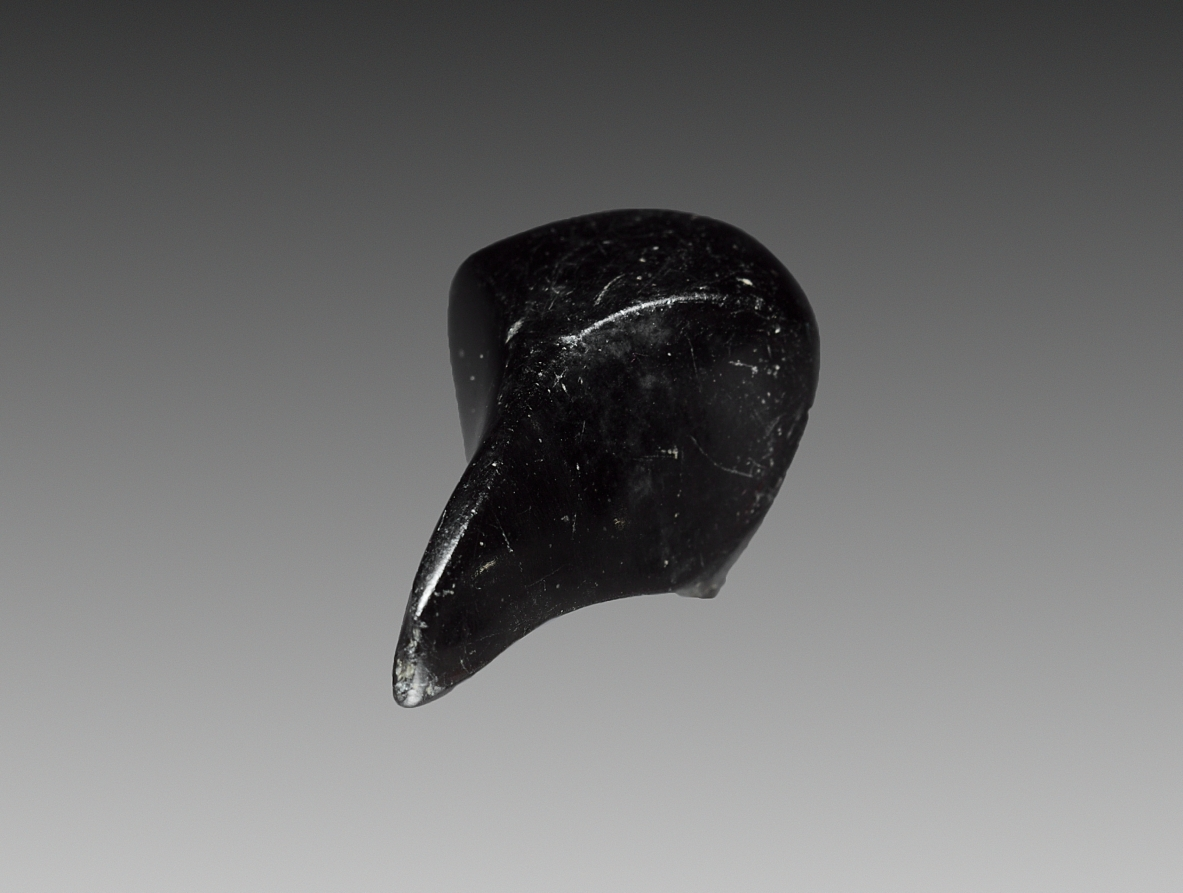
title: Bird Head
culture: Mexico, Valley of Mexico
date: before 1947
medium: obsidian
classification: Stone